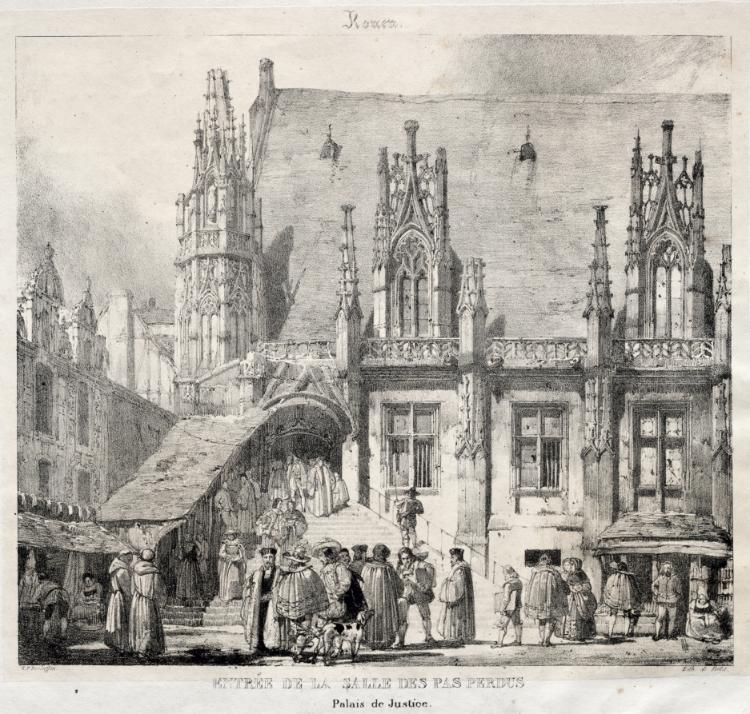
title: Rouen: Entrée de la Salle des Pas Perdus, Palais du Justice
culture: England, 19th century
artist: Richard Parkes Bonington (British, 1802–1828)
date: 1824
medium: lithograph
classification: Print